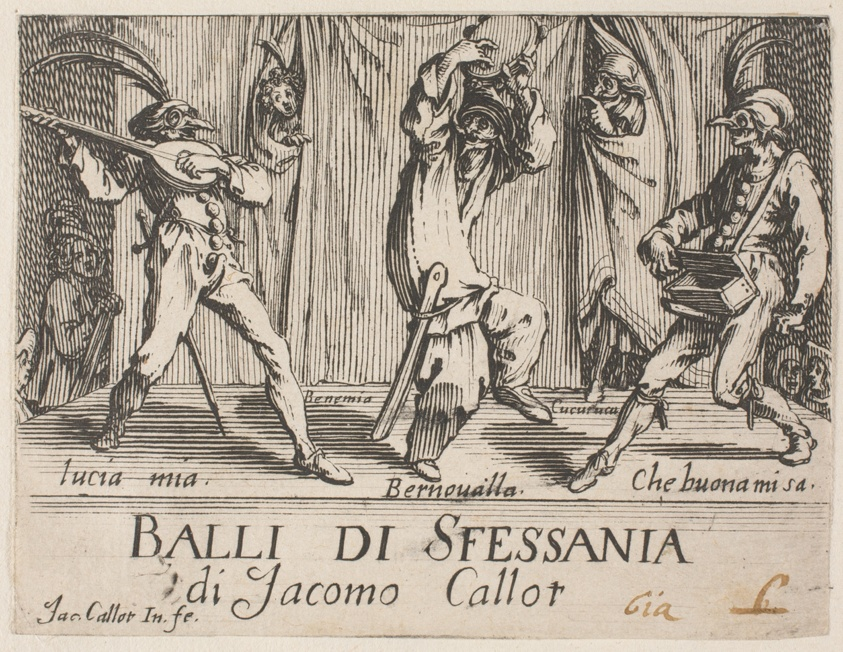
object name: Print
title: Frontispiece, from Balli di Sfessania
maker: Jacques Callot (French, 1592-1635)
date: c. 1622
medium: Etching and engraving on paper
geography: France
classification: etching; print; prints and drawing